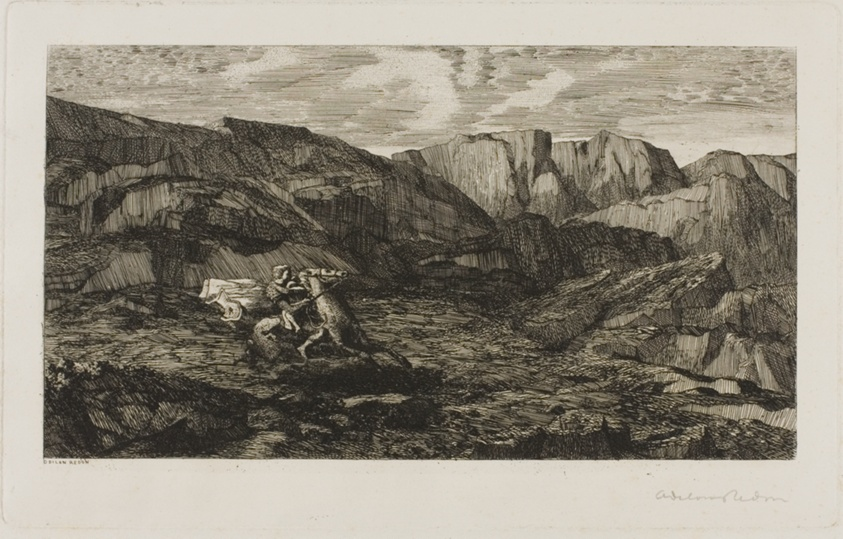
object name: Print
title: Fear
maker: Odilon Redon (French, 1840-1916)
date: 1866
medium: Etching on ivory wove paper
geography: France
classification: etching; print; prints and drawing; paper